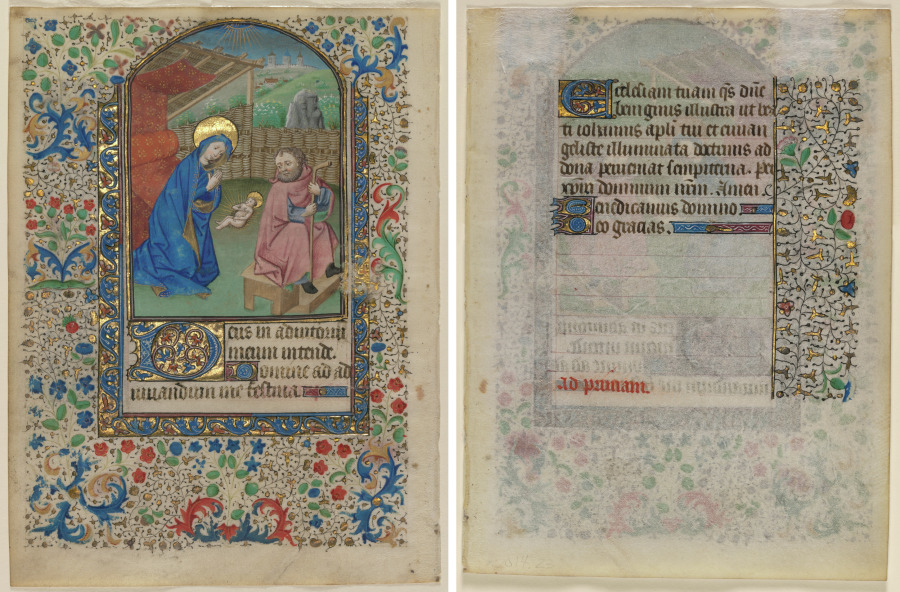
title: Leaf from a Book of Hours: The Nativity (recto) and Text (verso)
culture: Northeastern France, 15th century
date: c. 1430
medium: ink, tempera, and gold on vellum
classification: Manuscript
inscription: Deus in adiutorium meum intende. Domine, ad adiuvandum me festina.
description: Representing God's entry into the world, the Nativity remains one of medieval painting's most poignant Christian images. In the Gospels, only Matthew and Luke directly described this event. Perhaps the brevity and absence of detail in these texts allowed artists to devote so much creativity to amplifying the Christmas story. This miniature's simplicity makes it compelling. Only the three principals—Mary, Joseph, and the newly born Christ child—appear in the scene. The Virgin kneels before an elegant canopied bed made sumptuous by a richly embroidered textile, which stands in contrast to the nearby rustic fence and receding landscape. This scene probably follows the mystical visions of Saint Bridget of Sweden who visited Bethlehem in 1370, and whose written accounts circulated widely after her canonization in 1391: "When her time came she took off her shoes and her white cloak and undid her veil. . . . Then she made ready the swaddling clothes which she put down beside her. When all was ready she bent her knees and began to pray. While she was thus praying with hands raised the child was suddenly born, surrounded by a light so bright that it completely eclipsed Joseph's feeble candle."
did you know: Books of hours were devotional books popular in the Middle Age, meant for laypeople, or those not in the clergy. They were used at home and contained daily prayers as well as prayers for specific occasions, such as death, plague, warfare, travel, or bad weather.